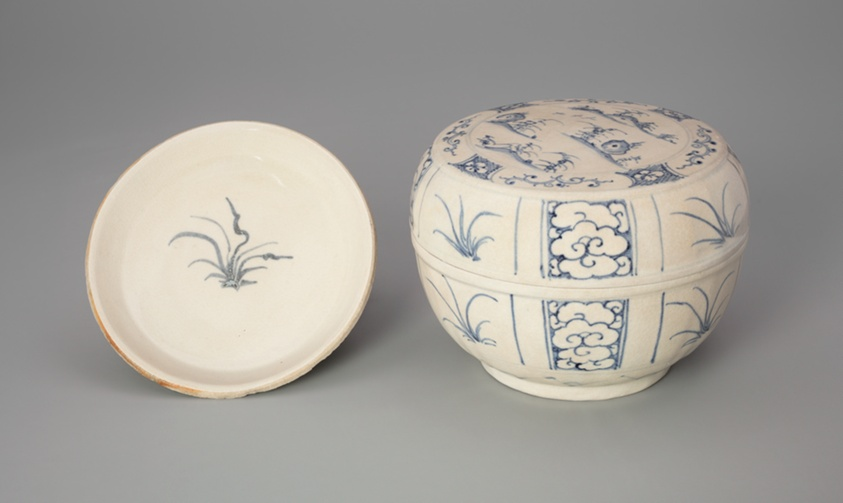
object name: Ceramics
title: Covered Box with Plant and Cloud Motif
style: Southeast Asian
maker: Vietnam; near Hoi An (offshore)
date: Late 15th/early 16th century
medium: Glazed stoneware with cobalt-blue underglaze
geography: Vietnam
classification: decorative arts; ceramics